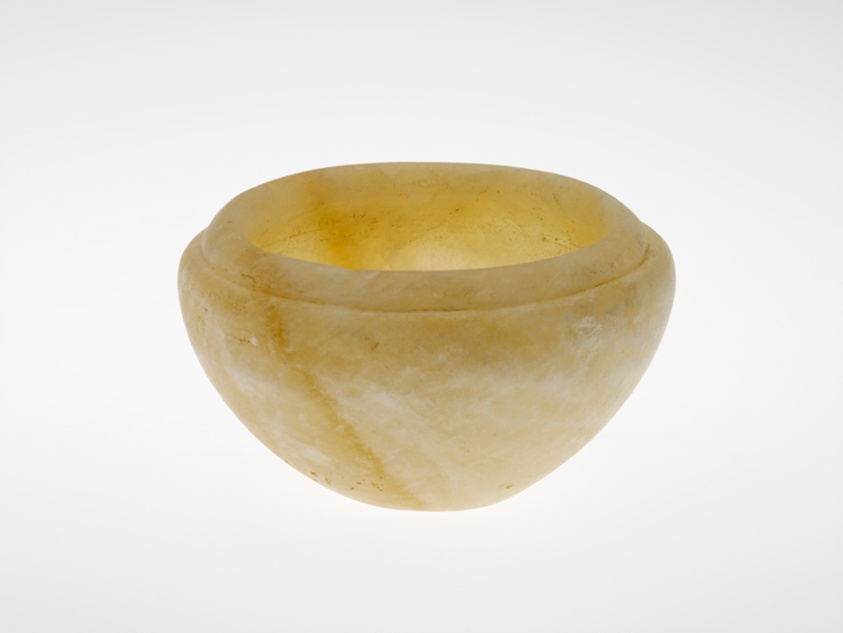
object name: Vessel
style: first dynasty, early dynastic (egyptian), ancient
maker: Egyptian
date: Archaic Period/Old Kingdom, Dynasty 1–3 (3050–2630 BCE)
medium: Travertine (Egyptian alabaster)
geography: Egypt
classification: vessel; stone; ancient art